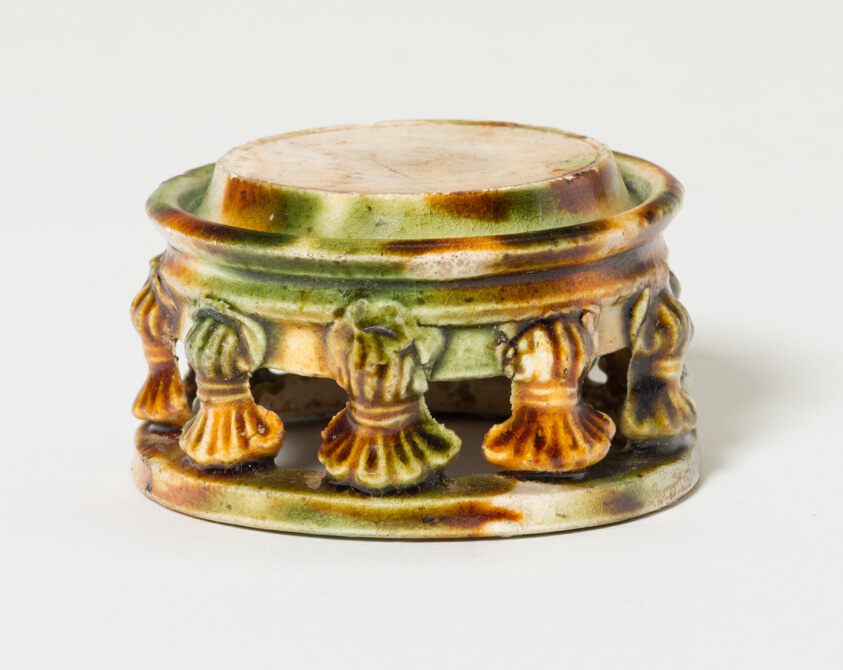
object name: Funerary Object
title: Model of an Inkstone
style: Chinese (culture or style)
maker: China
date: Tang dynasty (618–907)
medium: Earthenware with three-color (sancai) lead glazes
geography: China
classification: ceramics; asian art